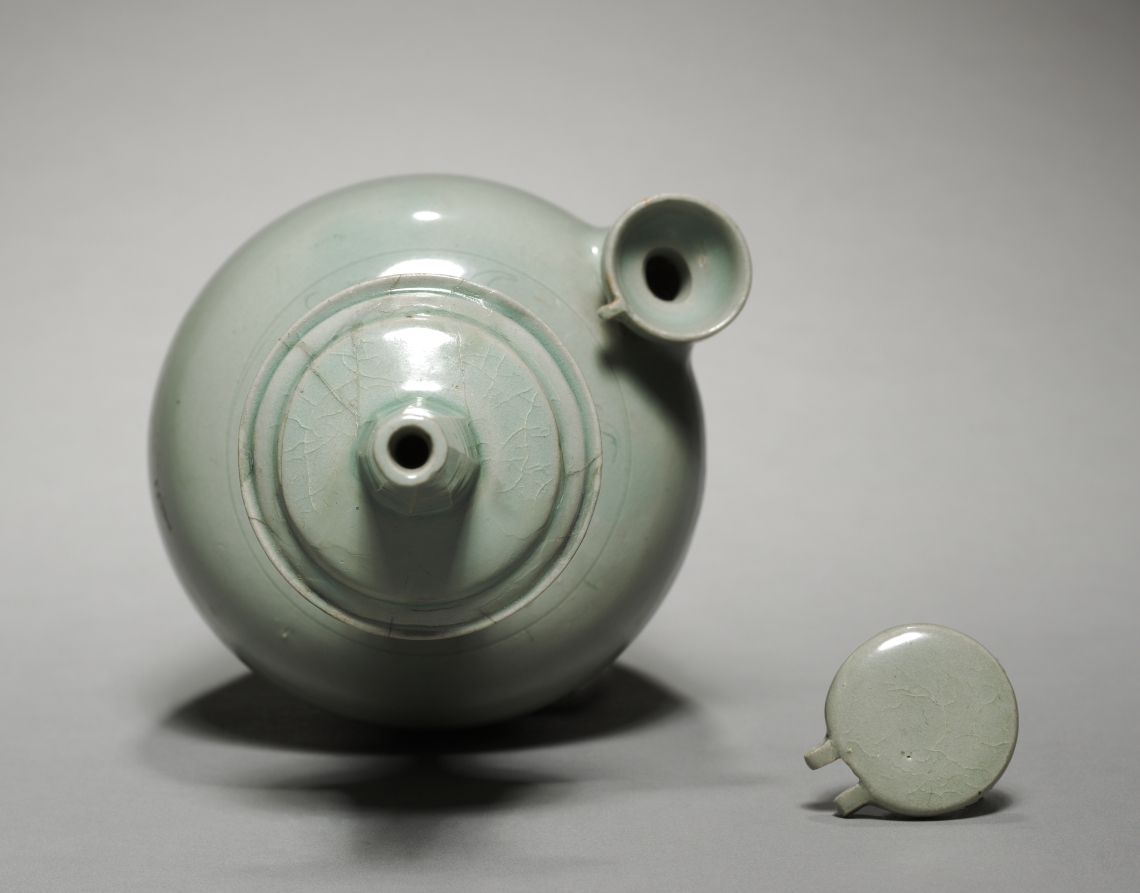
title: Water Ewer for Rituals (Kundika) with Incised Parrot Design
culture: Korea, Goryeo dynasty (918–1392)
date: 1100s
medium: stoneware with celadon glaze, incised and carved decoration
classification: Ceramic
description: This distinctively shaped celadon vessel is a kundika. With a spout on one side, this type of vessel is often used in Buddhist purification rituals. Unlike most existing examples that have an image of a willow tree, this work has a rare flying phoenix design incised on its surface. During the Goryeo period (918-1392), about 260 kilns operated in mainly Jeolla and Chungcheong provinces, meeting a soaring demand for high-end products like this example.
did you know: Unlike most existing examples that have an image of a willow tree or lotus pond, this ewer bears an image of flying parrots delicately incised on its surface.